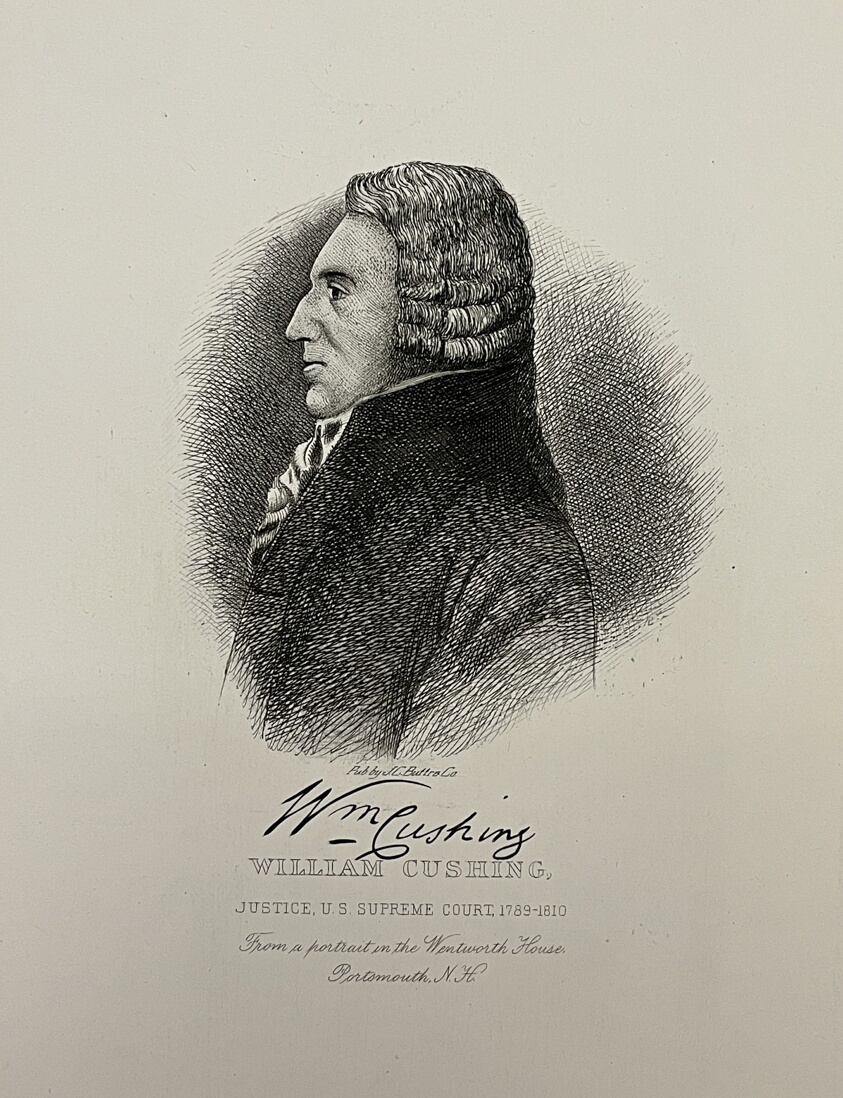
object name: Print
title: William Cushing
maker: John Chester Buttre (American, 1821-1893)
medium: Etching on paper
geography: United States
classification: reproduction; print; prints and drawing